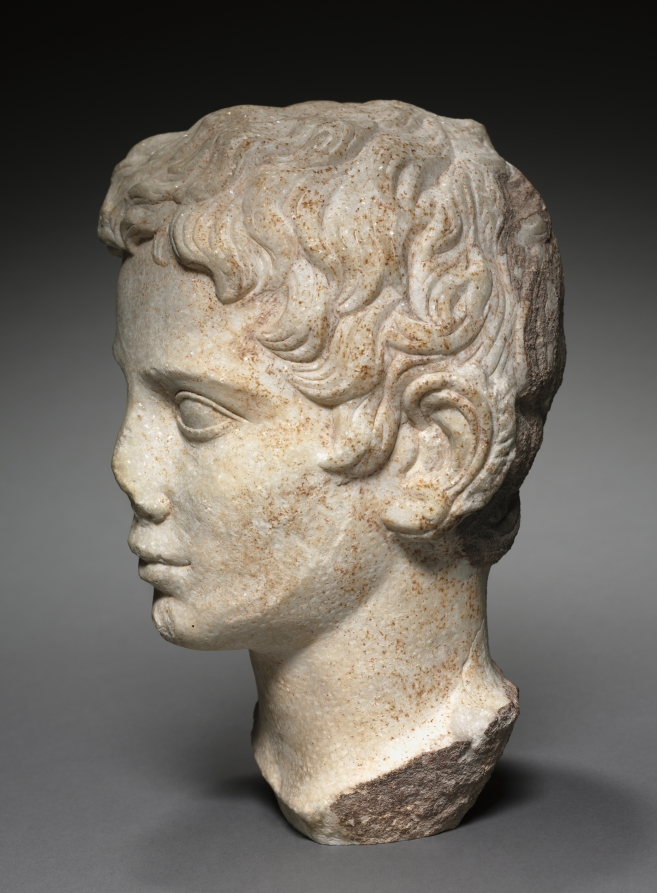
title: Portrait Head of a Youth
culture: Egypt, Alexandria, Roman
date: 1–100 CE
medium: marble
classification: Sculpture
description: Several unusual features of this head suggest that its carving was never finished in antiquity. These include unfinished hair around the ears, small bumps remaining in the hair near the front and top of the head, and the lack of a finely polished surface. Although said to have been found in Egypt, the head is carved of dolomitic marble thought to come from the Saliari region of the northern Greek island of Thasos.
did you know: The carving of this head was never finished.